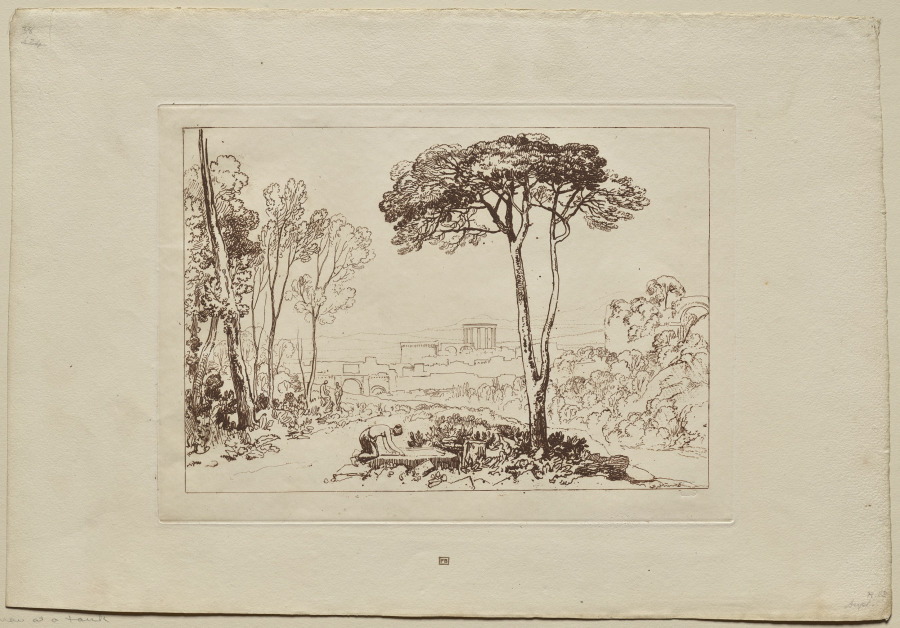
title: Liber Studiorum: Scene in the Campagna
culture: England, 19th century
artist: Joseph Mallord William Turner (British, 1775–1851)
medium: etching and mezzotint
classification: Print